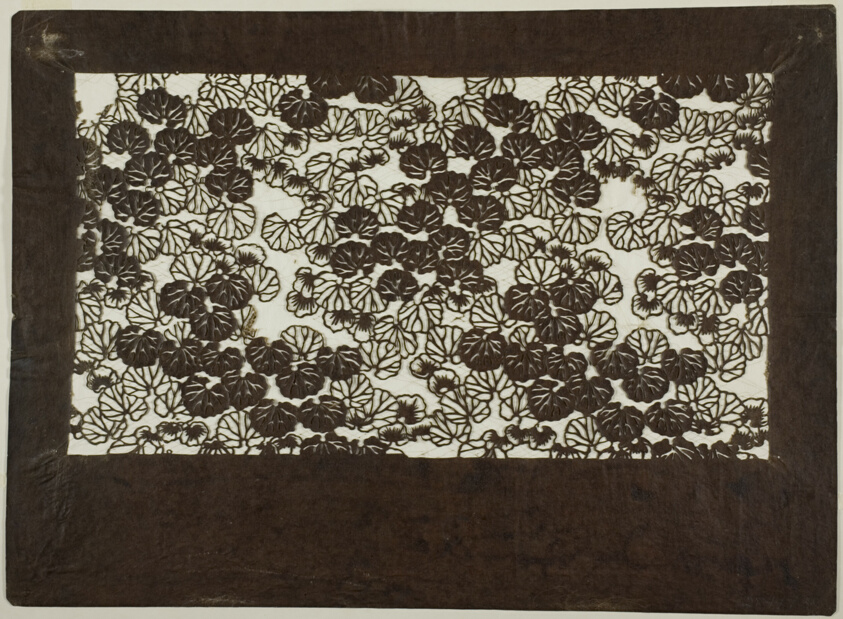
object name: Print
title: Stencil with Design of Mallows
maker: Japan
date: Late 19th century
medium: Mulberry paper treated with persimmon juice, with silk web reinforcement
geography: Japan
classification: stencil; asian art; print